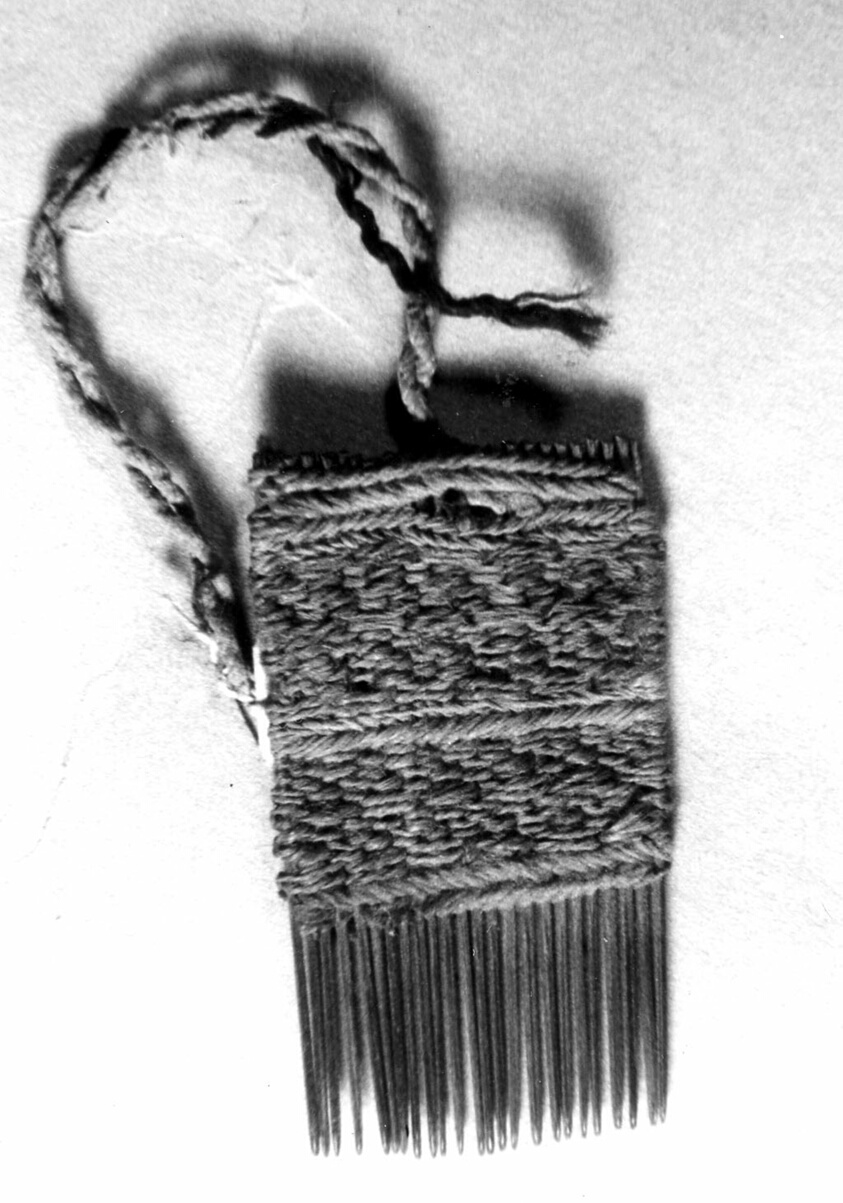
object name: Textile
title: Weaving Comb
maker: Peru, central coast, Rimac Valley, Possibly Santa Clara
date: A.D. 1000/1476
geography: Peru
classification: textile; textile working equipment; weaving; accessories (object genre)